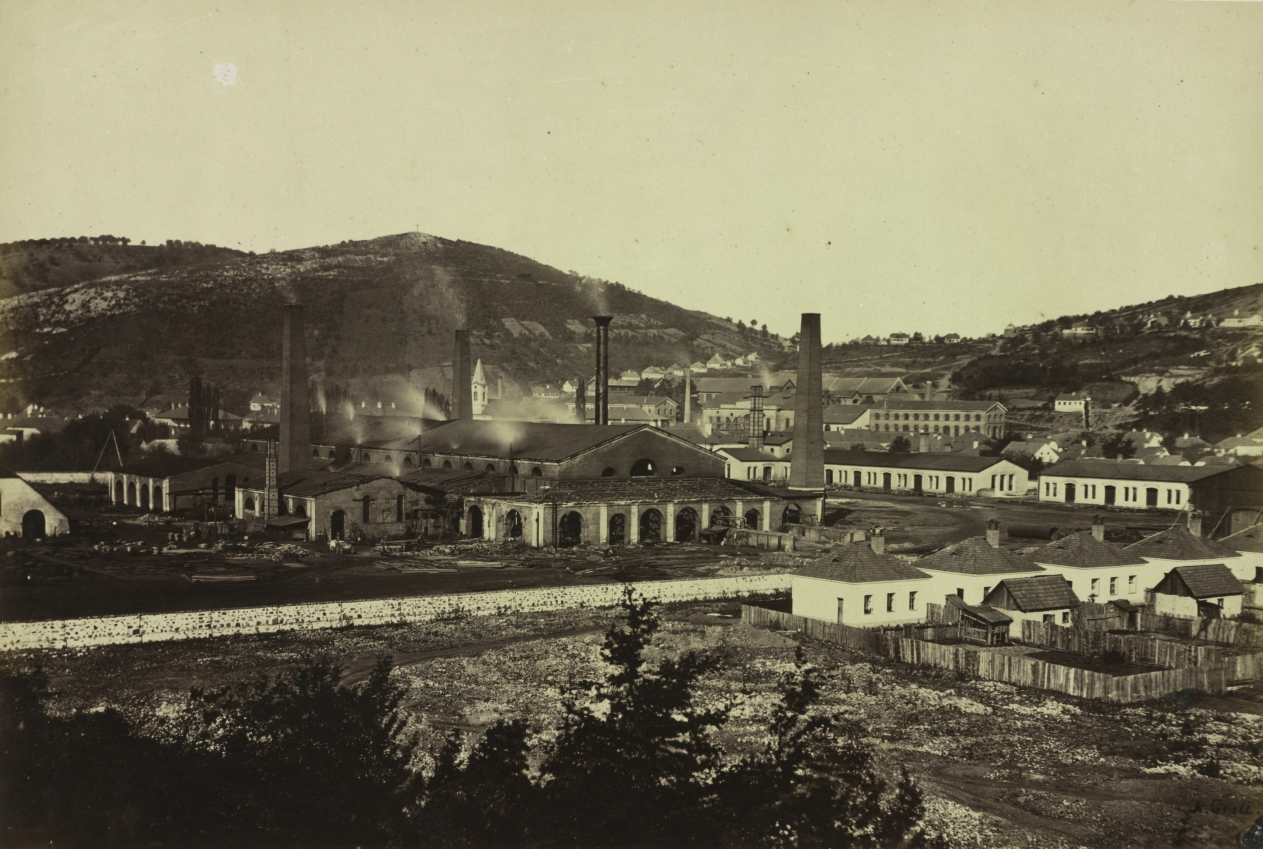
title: Ironworks in Reschitza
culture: Austria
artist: Andreas Groll (Austrian, 1812–1872)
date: c. 1860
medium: albumen print from wet collodion negative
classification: Photograph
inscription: Written in brown ink on recto: "A. Groll"; printed in black ink on label: "PUDDLINGSHÜTTE IN RESCHITZA"